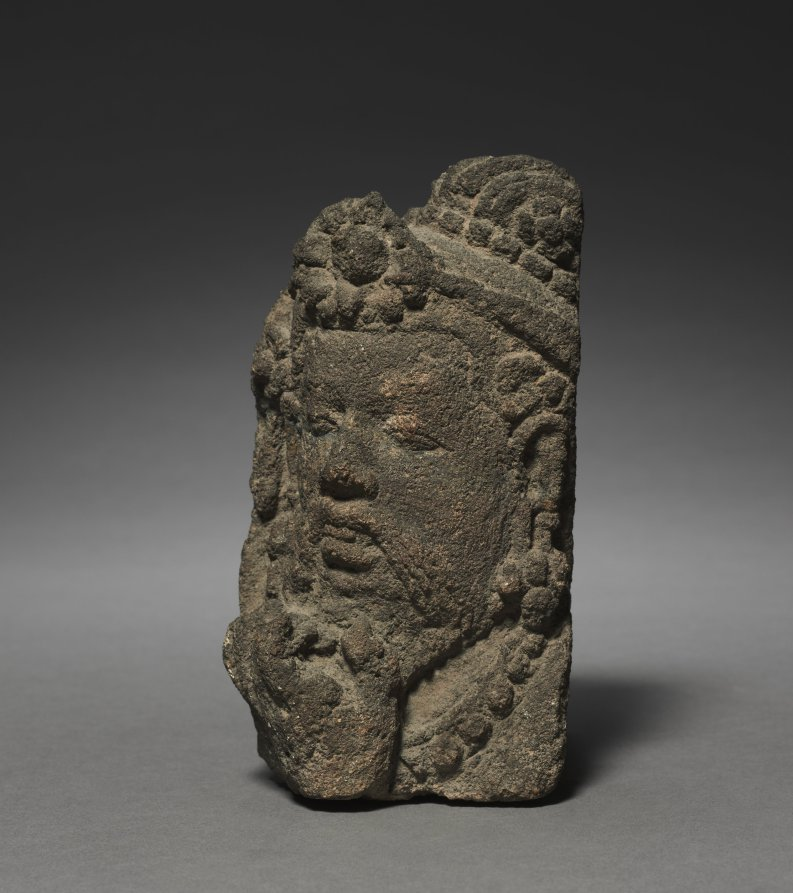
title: Head of a "Bearded Man"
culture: Central Java, Borobudur, c. 9th Century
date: c. 800s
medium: lava stone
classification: Sculpture